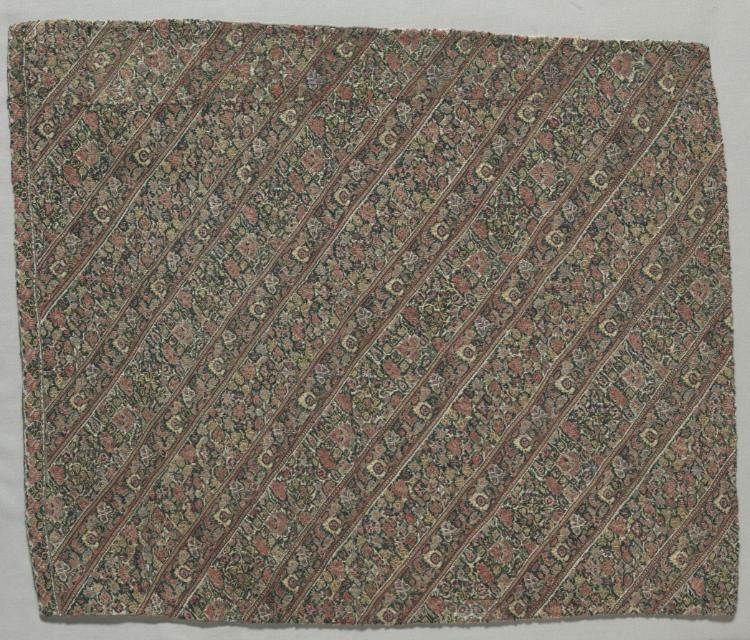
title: Woman's trouser fabric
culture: Iran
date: early 1800s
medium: embroidery, outline stitch: silk on cotton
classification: Embroidery